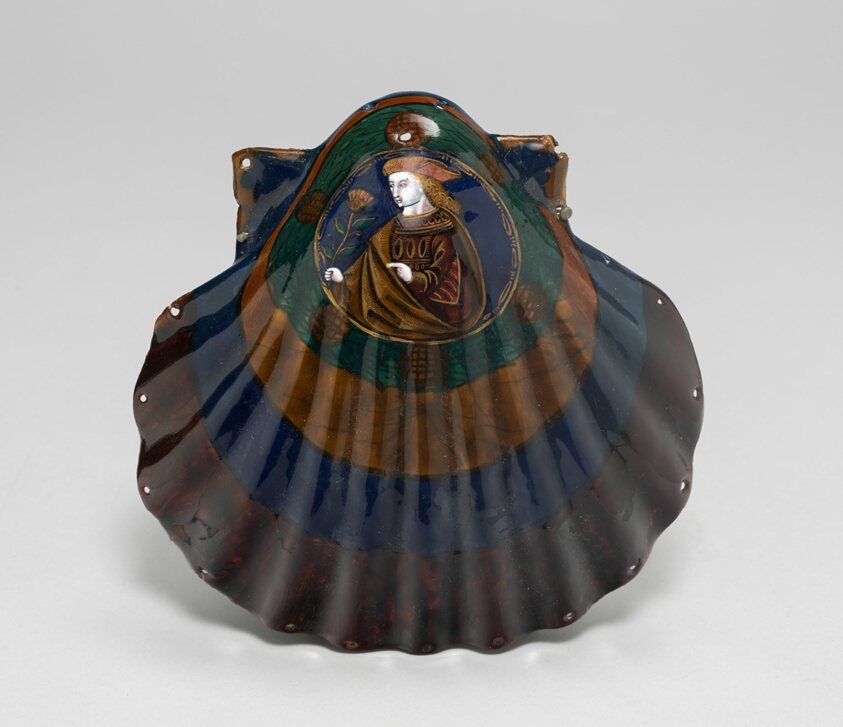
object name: Metalwork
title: Pair of Shells with Portraits Forming a Purse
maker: Limoges Pottery & Porcelain Factories; France, founded 1736; Attributed to Nardon Pénicaud; French, c.1470-1542/43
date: Early 16th century or 19th century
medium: Copper and enamel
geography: Limoges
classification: enamel; european decorative arts; metalwork